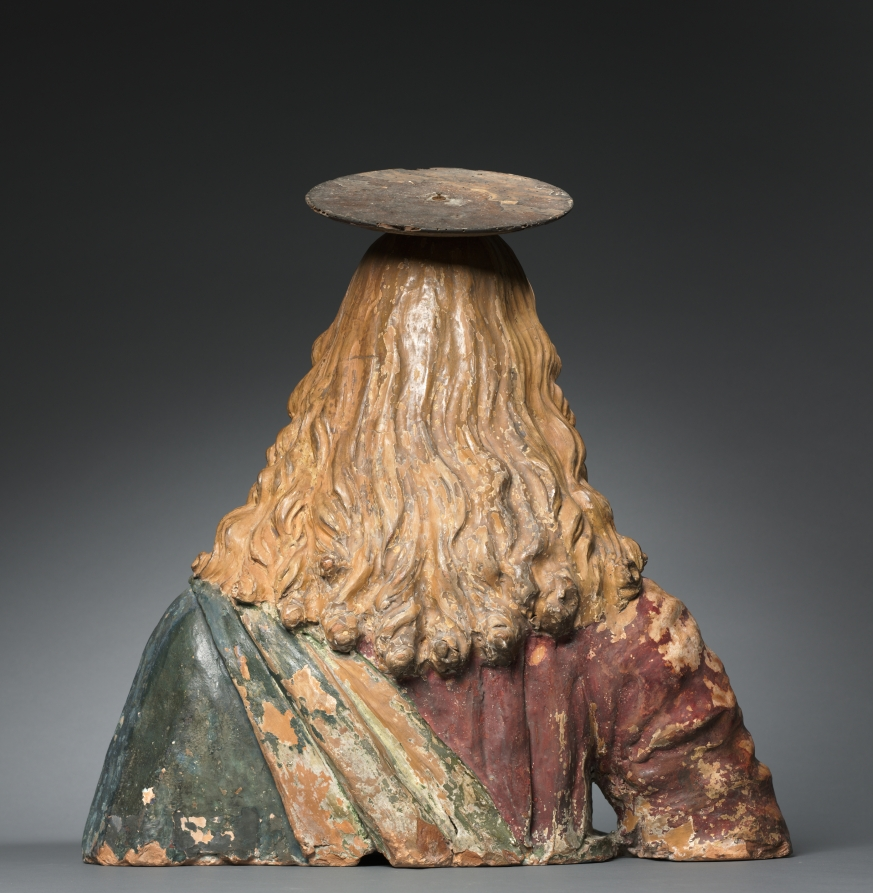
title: Bust of Christ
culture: Italy, Florence, 15th century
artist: workshop of Andrea del Verrocchio (Italian, 1435–1488)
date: c. 1470–1500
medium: painted terracotta and wood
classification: Sculpture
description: In the late 1400s Andrea del Verrochio set up a large workshop where he and his assistants reproduced copies of his sculpture and other works for a middle-class market. Originality was not the objective; in fact, most people were only interested in purchasing replicas of well-known works. This sculpture was modeled after Verrocchio's Christ figure in the bronze sculpture group Christ and St. Thomas at Orsanmichele in Florence, Italy. The medium of terracotta, which was cheaper than bronze or marble, made it possible to offer copies at a reasonable price. Additionally, workshop practices reduced the cost of the work by reducing labor time. Assistants were usually responsible for the shaping of the torso and garments, while Verrocchio was often in charge of executing the facial features and hair. In this sculpture the torso is out of proportion, and the general discrepancy in quality between the parts of the sculpture is due to the fact that it is a workshop production. Given that the facial features are so well executed and the statue retains a stirring motional quality, a trademark of Verrocchio's style which artists found hard to duplicate, it is probable that this sculpture was made in Verrocchio's studio, possibly even with active involvement by the artist on the head.